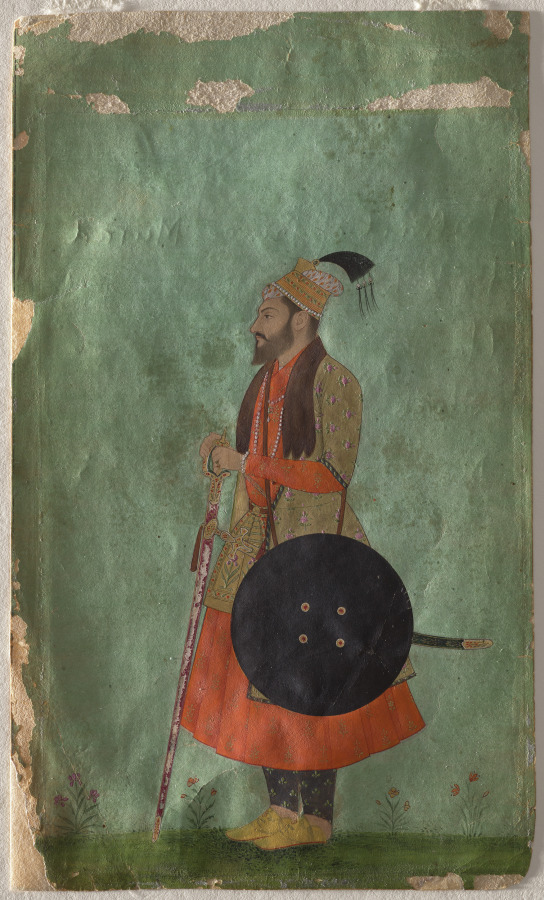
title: Portrait of Prince Murad Baksh (1624–1661)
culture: Mughal India, court of Shah Jahan (1627–58)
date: c. 1655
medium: Gum tempera and gold on paper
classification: Painting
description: This portrait depicts the Mughal prince Murad Baksh in his early 30s, at the height of his power and promise. He wears a golden coat of honor with fur collar and the swords and shield of a military officer. As the youngest son of Emperor Shah Jahan, he was intimately involved in the struggles for succession. In 1658, he sided with his brother Aurangzeb (1618–1707) against their eldest brother, the crown prince, whom they defeated in a decisive battle that led to the crown prince’s eventual assassination in 1659. Aurangzeb then turned on his youngest brother, Murad Baksh himself, and had him imprisoned and finally executed in 1661.